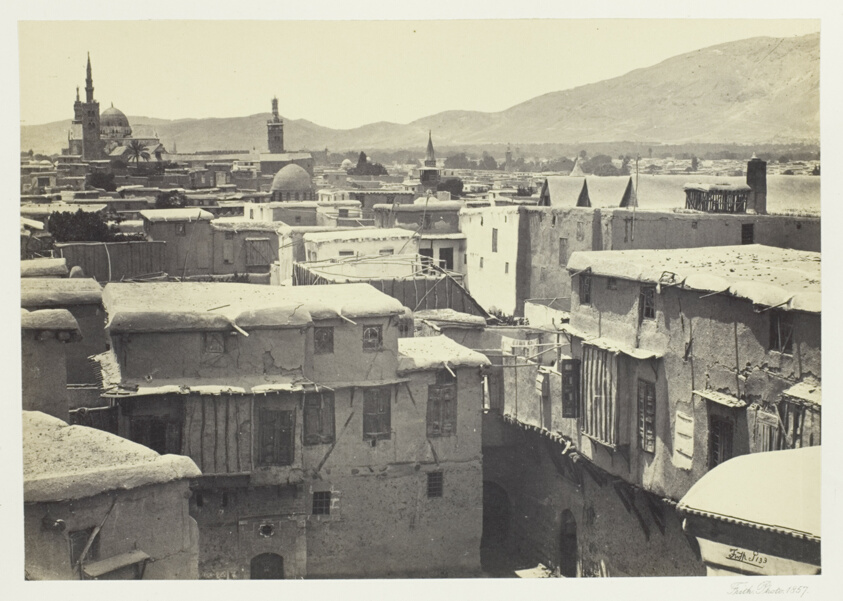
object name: Photograph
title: Damascus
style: 19th century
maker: Francis Frith (English, 1822–1898)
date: 1857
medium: Albumen print, pl. 22 from the album "Egypt and Palestine, Volume I" (1858)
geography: England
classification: photograph; albumen silver print; photography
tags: Collected by Hugh Edwards, Egypt and Palestine